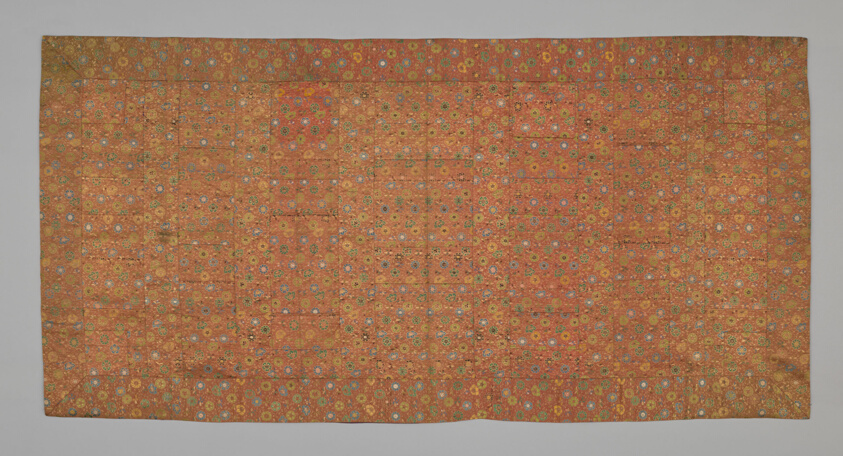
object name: Textile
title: Kesa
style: edo (japanese period), Japanism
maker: Japan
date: Edo period (1615–1868), late 18th century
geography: Japan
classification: textile; costume; liturgical - buddhist; weaving